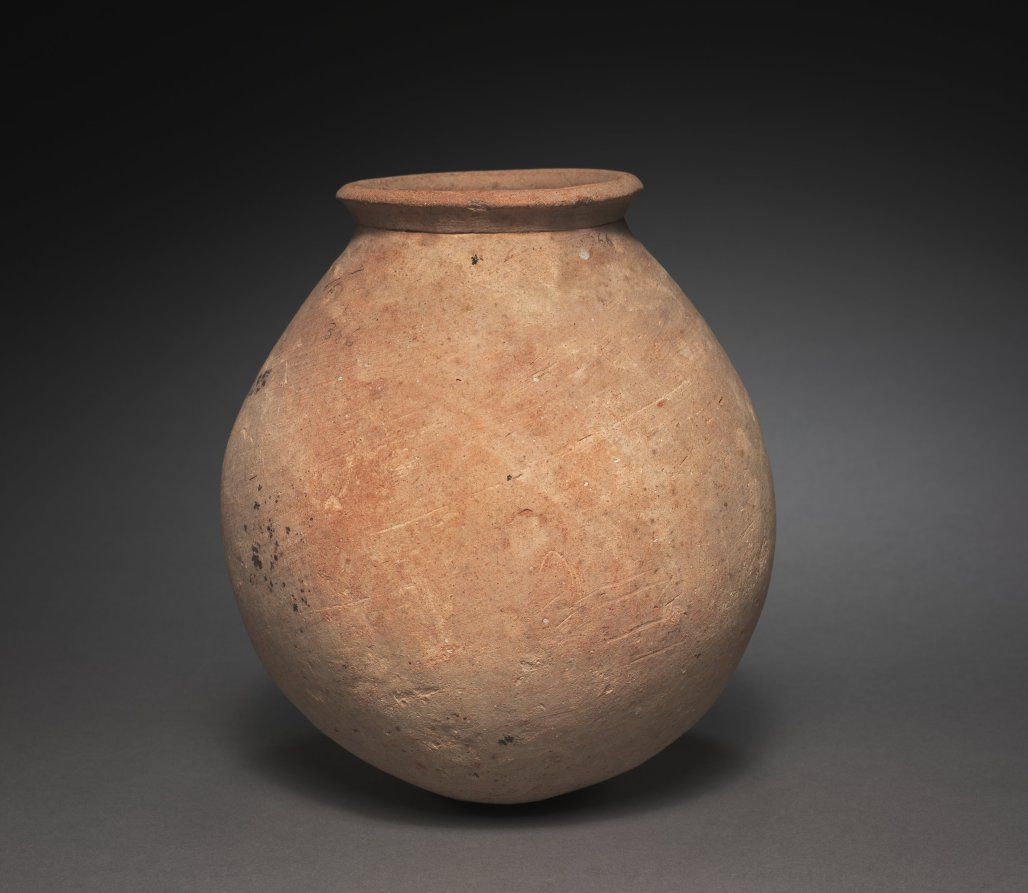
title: Water Jar (Globular Jar)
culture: Egypt, Haraga, cemetery S, tomb 366, excavated in 1914, Middle Kingdom (2040–1648 BCE), Dynasty 12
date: 1980–1801 BCE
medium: marl clay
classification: Vessels